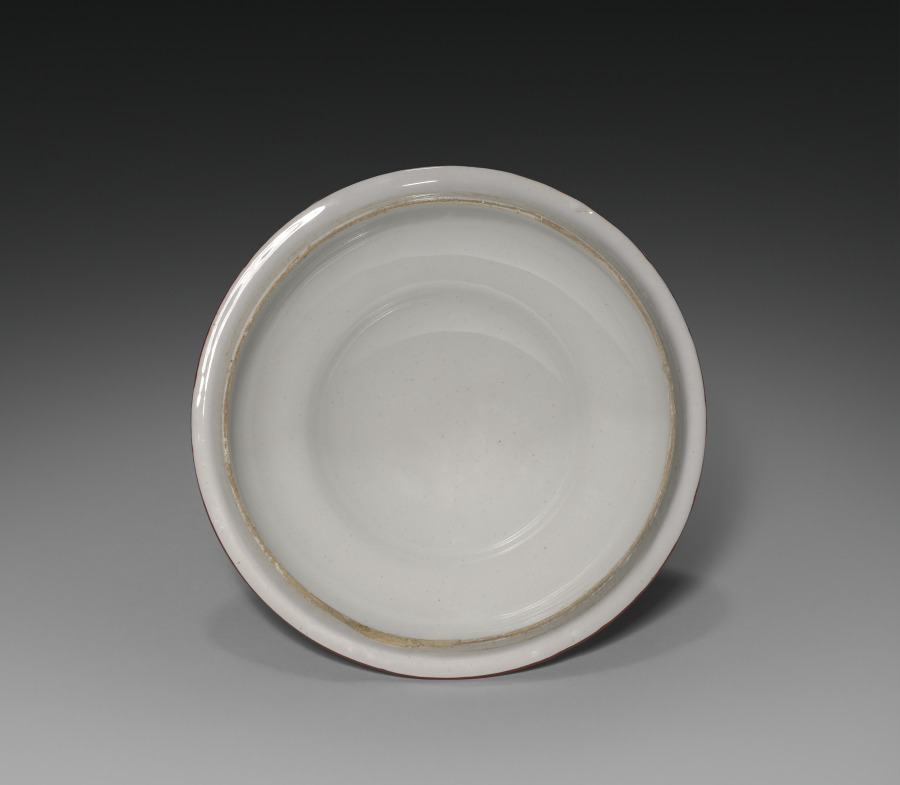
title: Cover for a Bowl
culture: France, 18th century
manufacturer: Saint-Clément Factory (French)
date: c. 1775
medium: tin-glazed earthenware (faience) with enamel decoration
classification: Ceramic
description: The faience factory at Saint-Clément in eastern France closely imitated the styles and techniques employed by the Hannong's at Strasbourg. The monochrome landscapes in red on this covered bowl demonstrate the influence of German, in this case Meissen, porcelain on the faience made in this part of France.